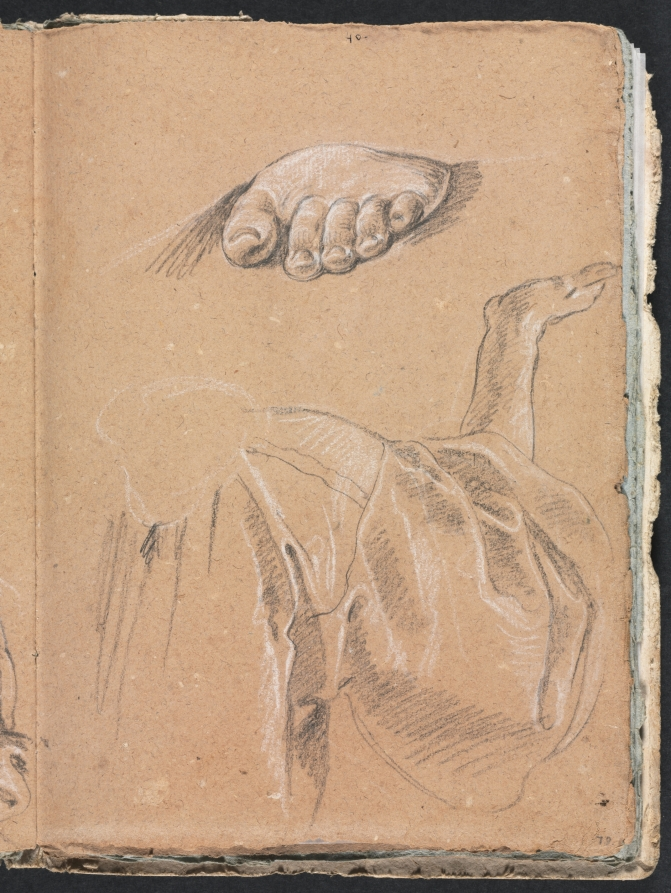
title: Verona Sketchbook: Study of a left foot and drapery study with right arm (page 79)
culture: Italy, 18th century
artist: Francesco Lorenzi (Italian, 1723–1787)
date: 1760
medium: black chalk with white heightening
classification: Bound Volume